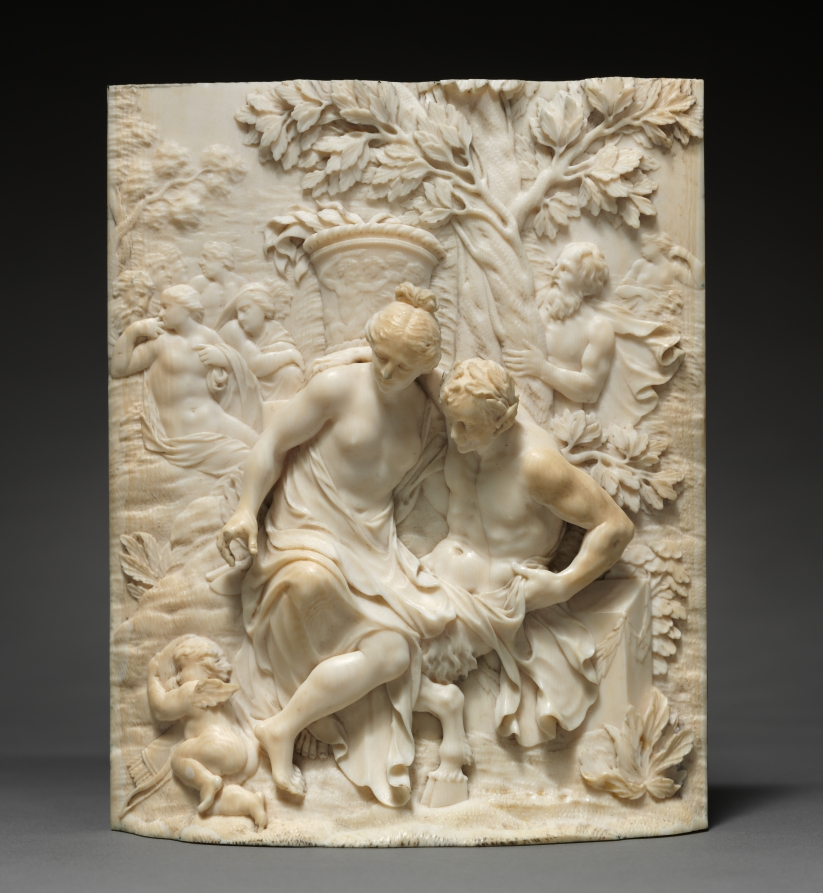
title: Venus and a Satyr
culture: Germany, late 17th-early 18th Century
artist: Ignaz Elhafen (German, 1658–1715)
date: c. 1700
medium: ivory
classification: Sculpture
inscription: inscribed in ink, almost certainly by a later hand, on back: Jupiter . . . a trompe ANTIOPE/SOUS la forme d'un Satyre/16 (?) 7 à Rome.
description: Elhafen depicted mythological scenes in many small ivory reliefs intended for domestic decoration. As with any work in ivory, the size of the tusk dictated this relief’s scale.